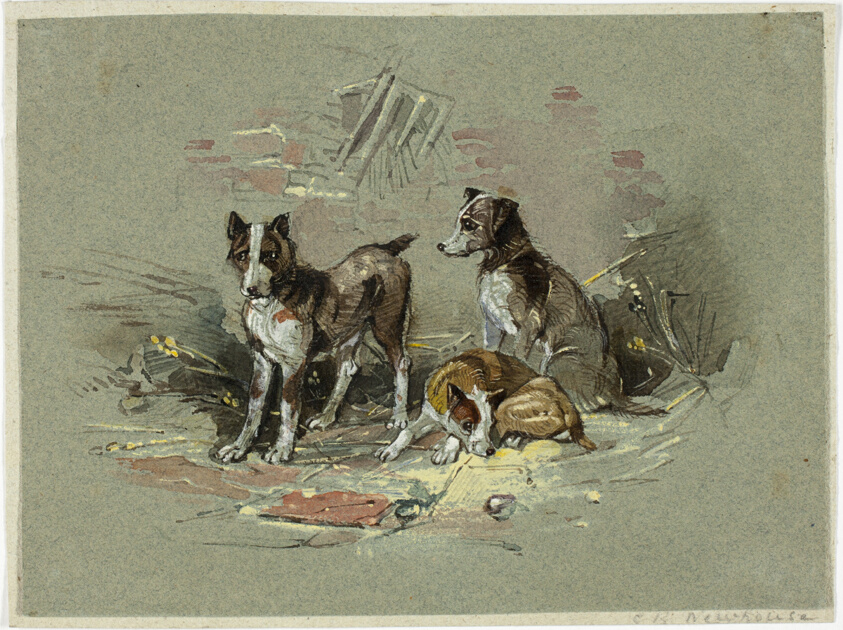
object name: Drawing and Watercolor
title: Three Dogs in an Alley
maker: Charles B. Newhouse (English, 1805-1877)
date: 1825-1877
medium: Watercolor and gouache heightened with gum varnish, over traces of graphite on blue wove paper, tipped onto gray laid paper Remarks: NG "Worth taking out"=LS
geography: England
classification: watercolor; drawings (visual works); prints and drawing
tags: dogs, animals